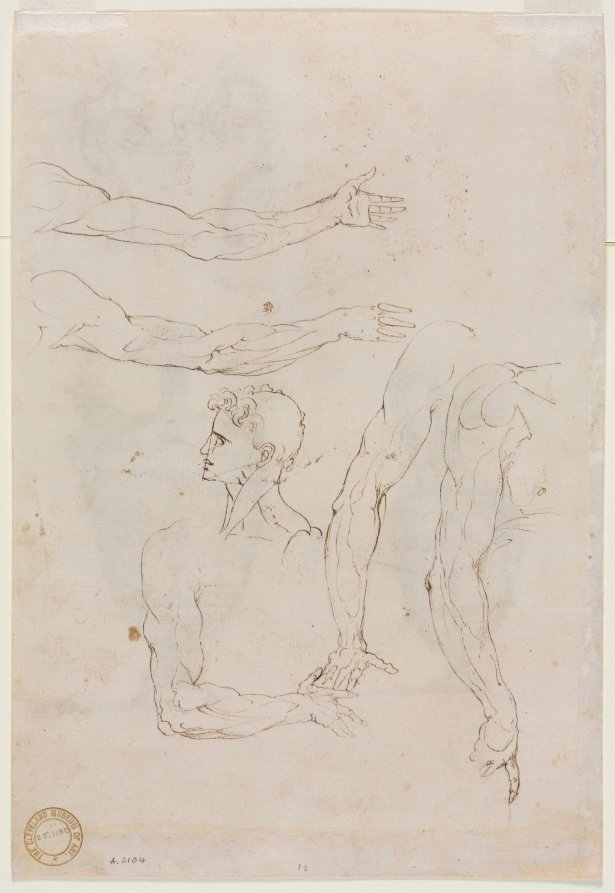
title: Sketches of Five Arms and a Head (verso)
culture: Italy, 16th century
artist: Luzio Romano (Italian, active 1528–75)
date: mid 1500s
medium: pen and brown ink and brush and brown wash, and charcoal underdrawing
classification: Drawing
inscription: lower left, in graphite: A. 3104 ; lower center, in graphite: 12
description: Luzio Romano’s drawing of arms and a head were made from a flayed body (a cadaver with its skin removed). The triangle placed over the facial profile points to the Renaissance artist’s interest in geometry and to the idea that the human body is the primary model of perfect proportions.